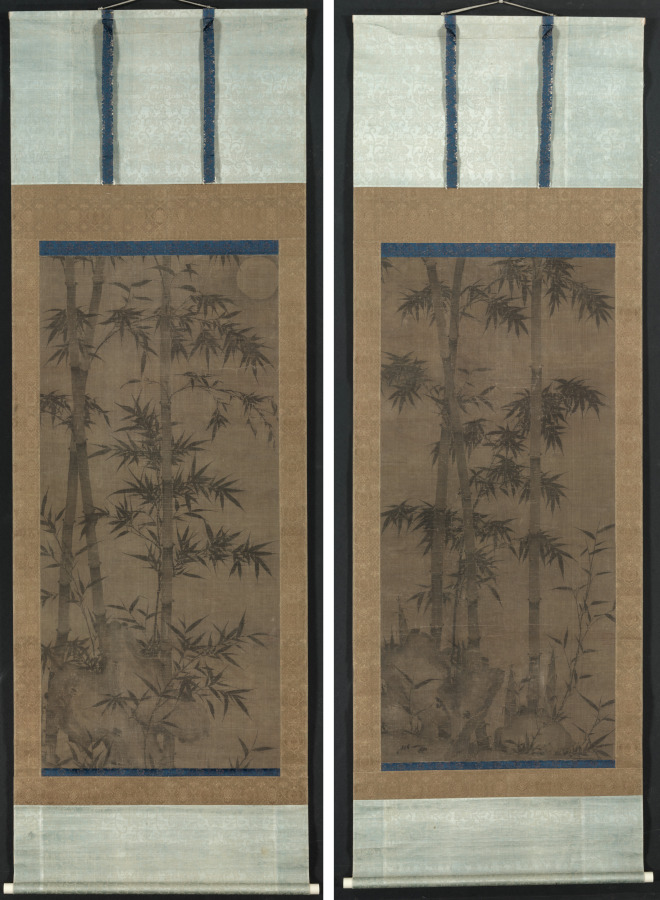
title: Bamboo in Four Seasons: Spring and Autumn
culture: China, Yuan dynasty (1271-1368)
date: 1279–1368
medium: hanging scroll, ink on silk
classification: Painting